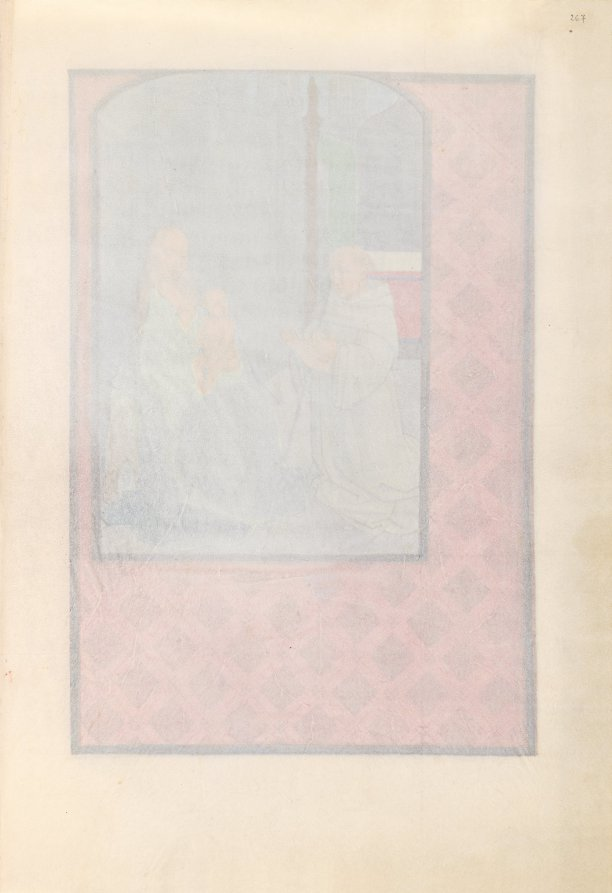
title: Hours of Queen Isabella the Catholic, Queen of Spain: Fol. 267r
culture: Flanders, Ghent and Bruges, late 15th century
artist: Master of the First Prayerbook of Maximillian (Flemish, c. 1444–1519)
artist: and Associates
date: c. 1500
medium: ink, tempera, and gold on vellum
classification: Bound Volume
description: This manuscript was illuminated by a circle of at least five highly organized manuscript painters active in the Flemish cities of Ghent and Bruges. The principal illuminator was Alexander Bening, who painted the majority of the book's miniatures. Manuscripts produced by this circle of artists are renowned for the decoration of their borders, which typically feature a rich variety of realistically-painted flowers, birds, and butterflies. This prayer book, called a book of hours, was intended not for a cleric, but for the private devotions of a lay person-in this case, Isabella the Catholic, Queen of Spain (1451-1504). Isabella's coat of arms embellishes the book's frontispiece. It is unlikely that the book was commissioned by the Queen herself; rather, she probably received it as a diplomatic gift from someone courting her patronage, perhaps Cardinal Francisco Jimenez de Cisneros. A Franciscan friar, Jimenez was dependent upon Isabella for his advancement, first to the post of Queen's confessor in 1492, and then to Archbishop of Toledo in 1495.